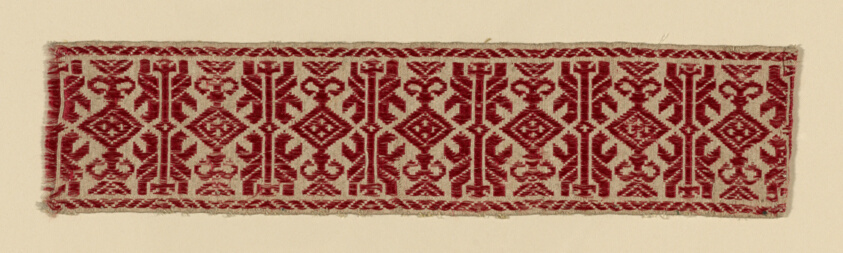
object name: Textile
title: Band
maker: Italy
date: 16th century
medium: Linen, embroidered with silk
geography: Italy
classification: textile; needlework (visual works)